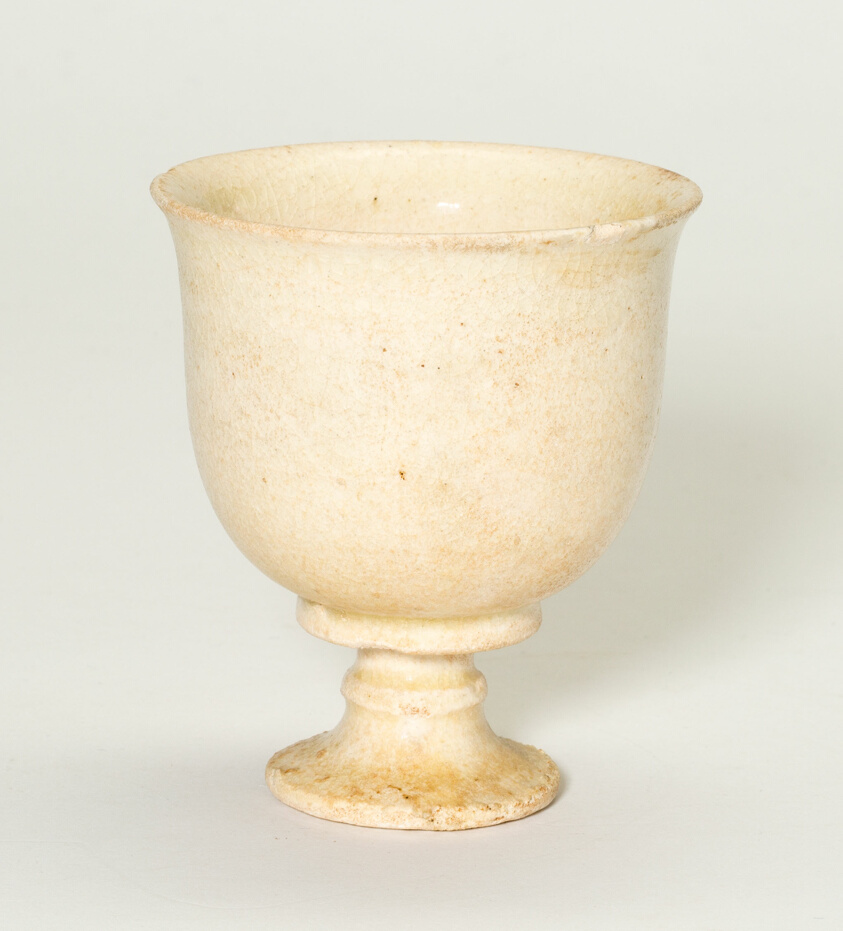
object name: Vessel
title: Stem Cup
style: Chinese (culture or style)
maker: China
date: Tang dynasty (618–907), 8th century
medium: Stoneware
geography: China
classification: drinking vessel; stoneware; ceramics; asian art; vessel